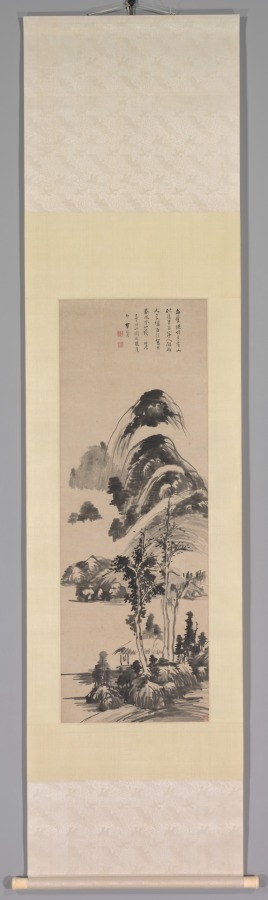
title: Thin Forest and Distant Mountains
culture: China, Ming dynasty (1368–1644)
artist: Li Liufang (Chinese, 1575–1629)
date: 1628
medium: hanging scroll, ink on paper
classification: Painting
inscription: Artist's inscription, signature, and 2 seals: Thin forest and distant mountains have always attracted me; As if they were from the brush and ink of Ni Tsan, left behind by the master in this mortal world. Now that the quiet recluse has chosen to live in the South of the City. He paints the spring breeze---over a curve of the river. In the spring day of the wu-ch'en year [1628] I made this painting and attached an old poem. Li Liu-fang [seals] Li Liu-fang-yin; Chang-heng shih. trans. WKH 1 additional seal of Chung Wen-ming (17th c.).